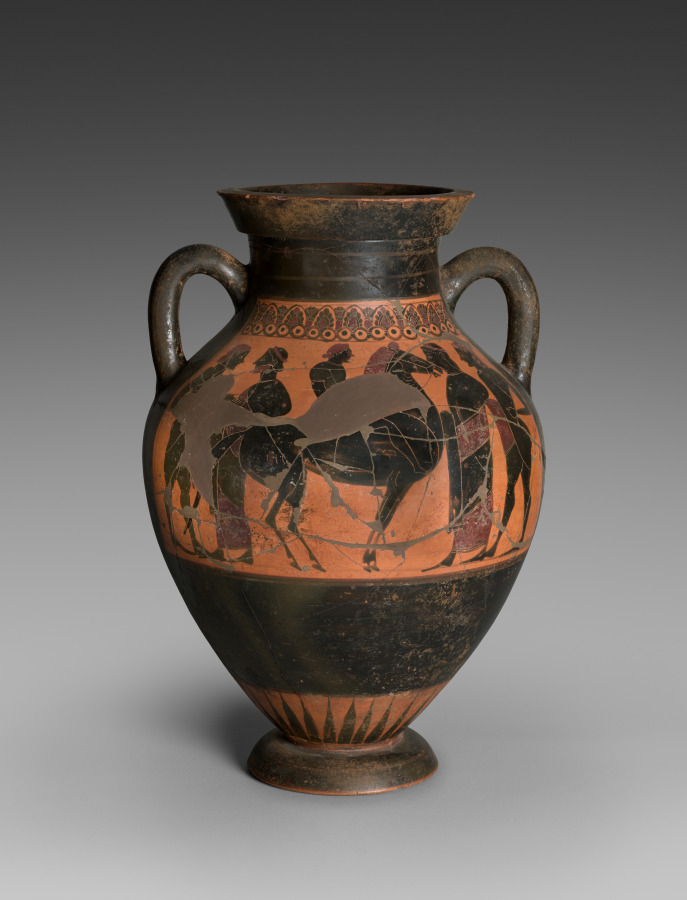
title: Black-Figure Amphora (Type B; Storage Vessel): Men and Horses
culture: Greek, Attic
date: c. 540 BCE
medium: ceramic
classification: Ceramic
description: Although pieced together from many fragments (with some still missing), this sizeable amphora remains impressive. On each side, a horsemen and four figures are contained within a large, reserved panel beneath a lotus-palmette frieze. The scenes, which differ slightly from one another in various details, cannot be identified with known historical or mythological figures or episodes.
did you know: The two sides of this amphora are very similar—a horseman flanked by pairs.